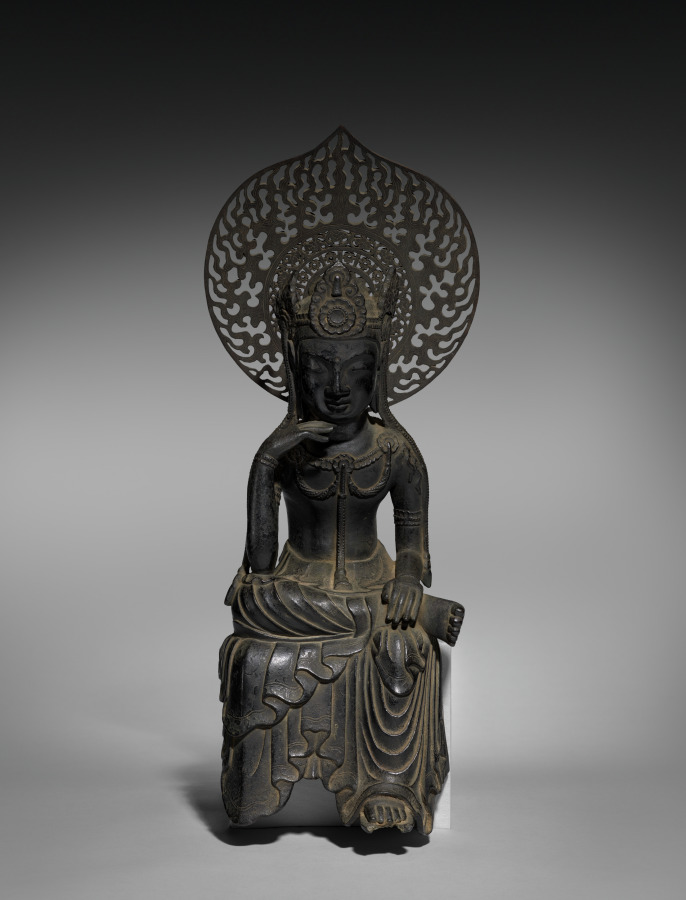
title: Buddha of the Future (Miroku Bosatsu)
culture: Japan, Asuka period (538–710)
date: late 600s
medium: cast bronze, incised, with traces of gilding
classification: Sculpture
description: Buddhism was introduced to Japan in the sixth century. For early Japanese devotees, Buddhism offered the promise of salvation through faith in the Buddha of the Future, who would appear at the end of the world. The concept of eternal salvation held particular resonance with the Japanese aristocracy, who became the staunchest supporters of this new faith. Small sculptures like this one, with its gentle grace and powerful presence, were popular devotional objects.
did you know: The Sanskrit name of this being, Maitreya, derives from the Sanskrit word for friend, mita.